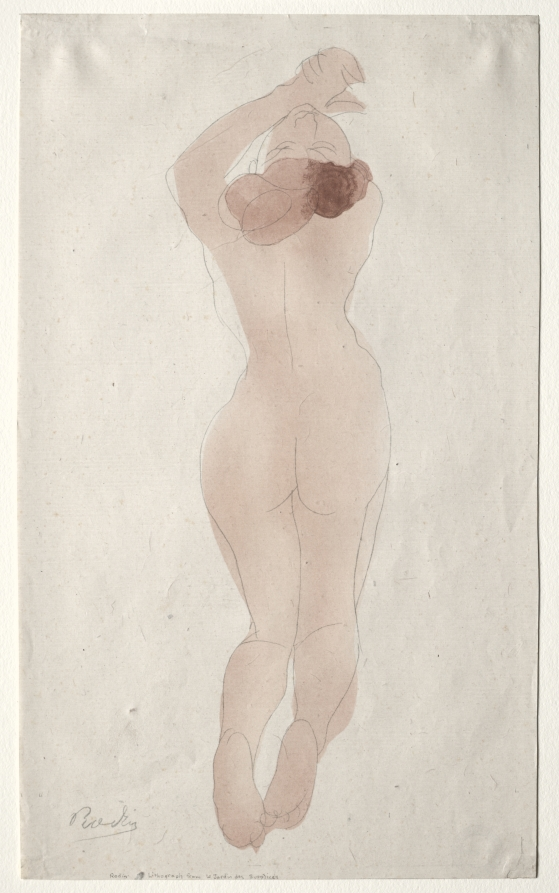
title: Caresse - moi danc, chéri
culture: France, late 19th-early 20th Century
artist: Auguste Rodin (French, 1840–1917)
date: 1902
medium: lithograph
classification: Print